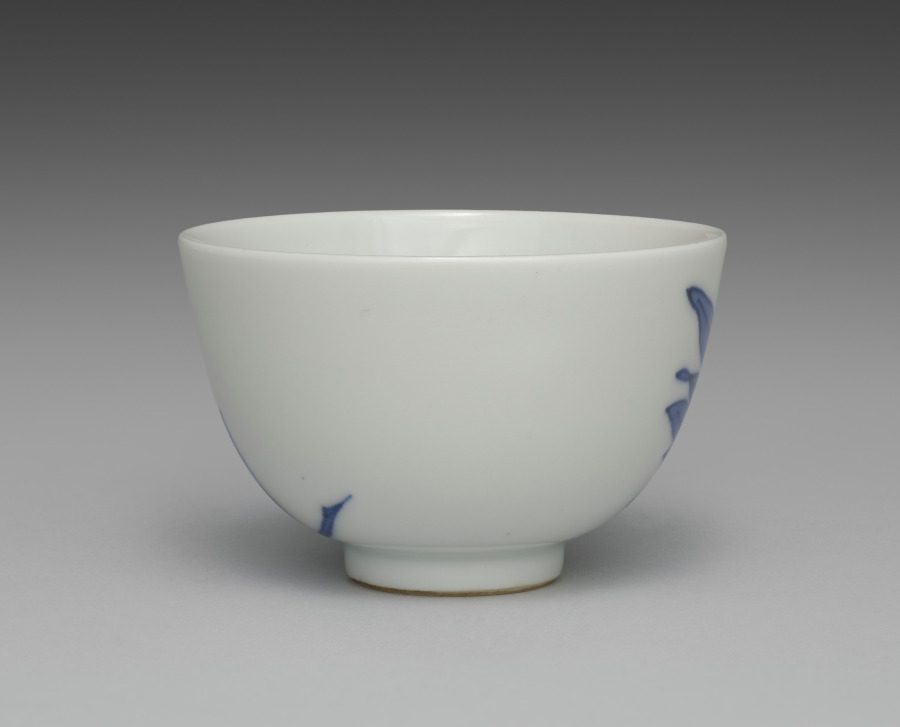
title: Teacup from Tea Set with Orchids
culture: Japan, Meiji period (1868–1912)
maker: Seifū Yohei III (Japanese, 1851–1914)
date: c. 1893–1914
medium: Porcelain with underglaze blue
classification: Ceramic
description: Although the teapot here is stored in a separate box from the five cups, these six pieces may once have been part of a tea set that included other tools such as a water cooler. The teacups have orchid flowers on both sides in underglaze blue, as well as a blue band inside the footring. The teapot has the same design and a blue band painted around the bottom of the lid’s knob. The cups’ long wood storage box is stamped on the exterior, over the lid and base, with a small red seal reading “Satō.” The same seal appears on five small squares of yellow textile, one placed in the bottom of each compartment in the teacup storage box. These are additional to the customary yellow cloths stamped with a “Seifu” seal. Interestingly, four of the Seifū cloths are stamped with an ovoid seal, while the remaining cloth, which is a slightly lighter color, has an unusual seal that is not quite gourd-shaped and with the fū of Seifū in a stylized, unrecognizable form. The teapot has its own box with a Satō seal and is wrapped with an orange textile stamped with the same unusual Seifū seal. A set with a very similar surface design is in the Brooklyn Museum. The Brooklyn set has a water cooler and a small pitcher, in addition to the teapot and cups, and all are in a single storage box. This box records the tea tools as made with kanpakuji, or “bright-jewel white porcelain,” counted among Yohei III’s most important inventions, and carved images. In fact, both sets have a white surface much closer in coloration to the cool white of porcelain clay used in Kyoto at the time, and the designs are simply painted. The Brooklyn set was thus likely mismatched at some point with a box intended for another tea set. Nonetheless, the box may have helped prevent the set’s original components from being dispersed, and the set itself provides insight into how the other tools from the present set may have looked.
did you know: This tea set with orchids has a side-handled pot called a kyūsu, used for steeping, straining, and serving tea.